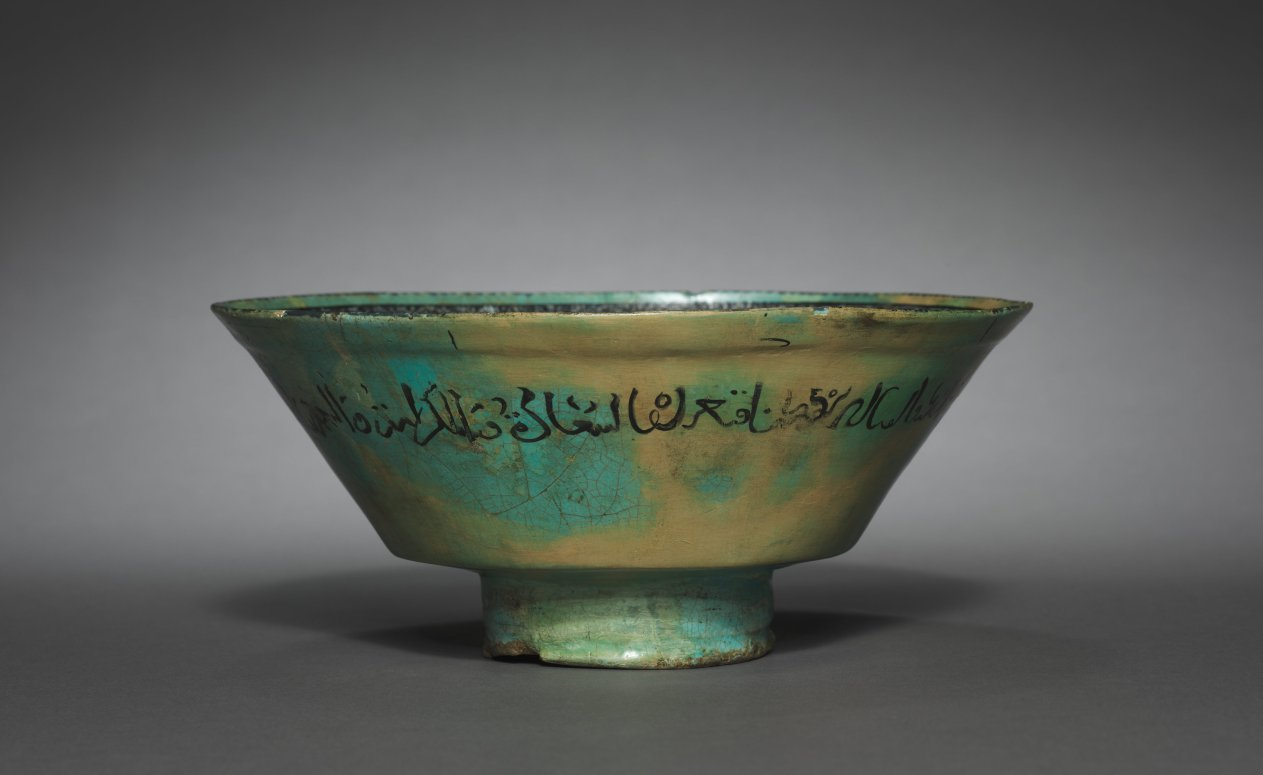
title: Bowl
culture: Iran, Seljuq period (1037–1194)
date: late 1100s–early 1200s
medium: fritware with overglaze-painted design (minai ware)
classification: Ceramic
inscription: Two bands of Kufic inscriptions on the interior of the bowl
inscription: Naskhi inscription on the exterior of the bowl